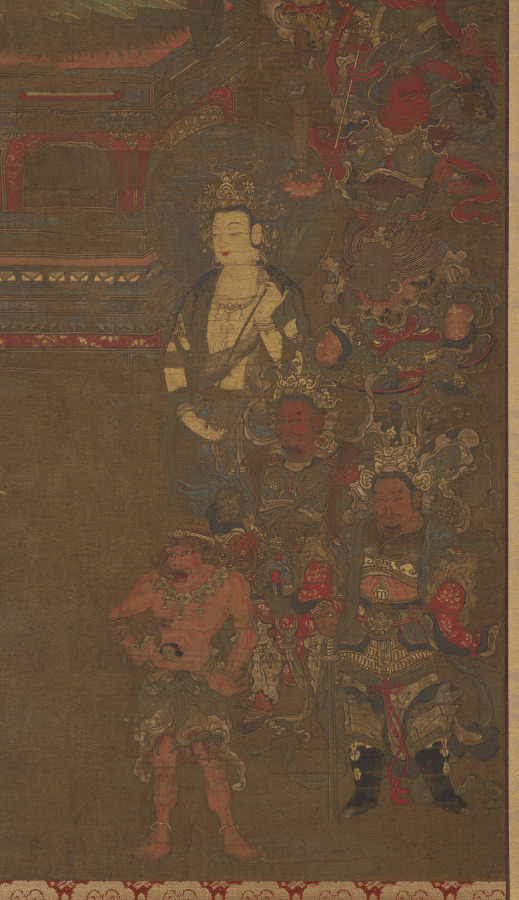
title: Shakyamuni with the Sixteen Benevolent Deities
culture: Japan, Nanbokuchō period (1336–92)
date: mid- to late 1300s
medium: Hanging scroll; ink, color, gold and cut gold on silk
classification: Painting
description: The historical Buddha Shakyamuni forms a triad with the bodhisattvas Fugen and Monju. Sixteen deities who protect the Buddhist scripture called the Great Perfection of Wisdom Sutra surround them. At the bottom left stands the Chinese monk Xuanzang, noted as a Buddhist scholar and translator of religious texts from India, including the Great Wisdom Sutra.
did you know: This painting would have been the main icon for ceremonial readings of the Great Perfection of Wisdom Sutra.